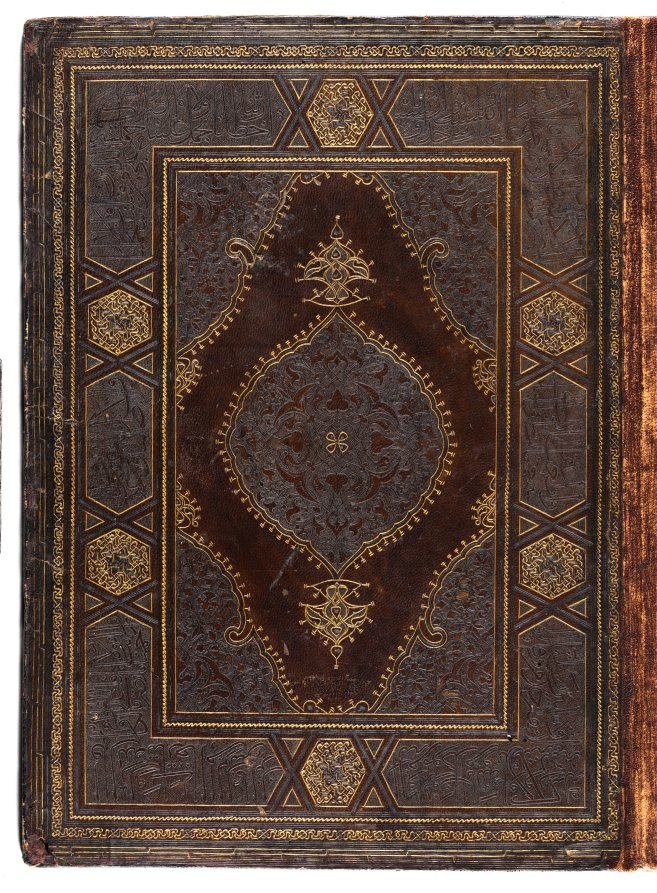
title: Bookbinding for a Qur'an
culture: Turkey, Istanbul, Ottoman period, 15th century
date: 1460–1500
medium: leather over paper pasteboards; outer cover tooled, blue paint; inner covers openwork designs over colored papers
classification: Book Binding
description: Islamic book covers generally have a triangular flap attached to the rear cover of the binding which is tucked under the front cover to protect the outside edge of the pages. The outer covers of this particularly elaborate example feature panels with Qur'anic inscriptions, interlace patterns, and a central medallion filled with floral and arabesque designs. The inner covers offer a superb example of leather openwork, a leather technique that originated in northeastern Iran in the 1400s.